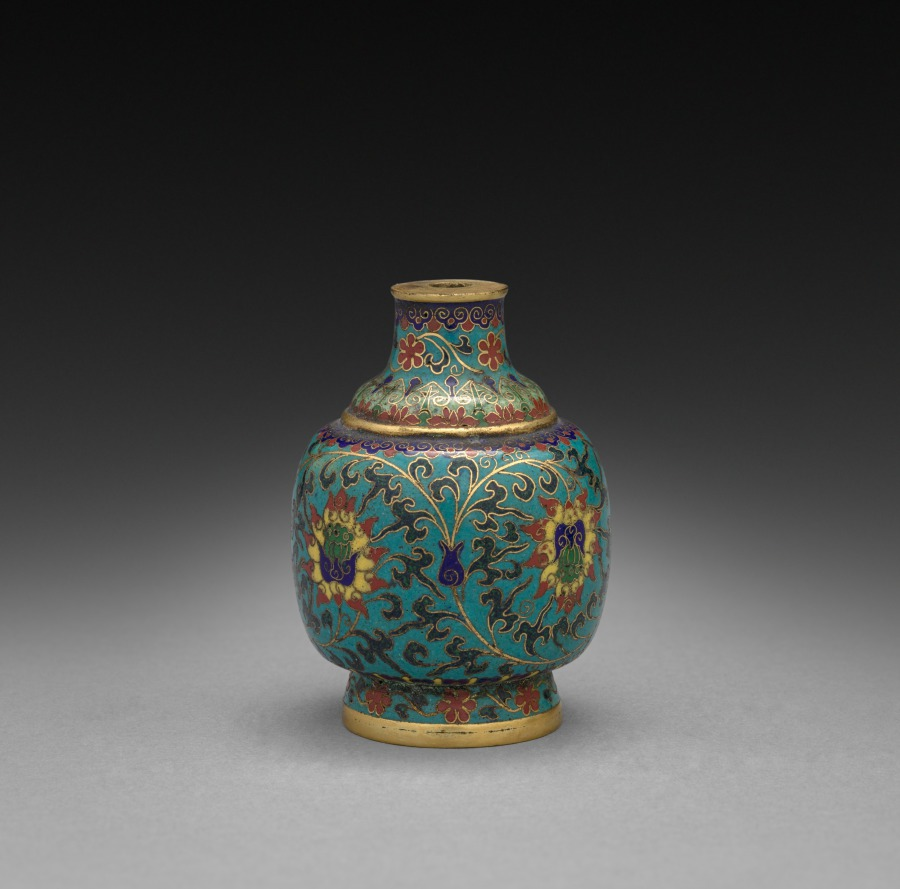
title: Snuff Bottle with Floral Scrolls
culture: China, Qing dynasty (1644-1911), Qianlong mark and reign (1736-95)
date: 1736–95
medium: cloisonné enamel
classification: Enamel